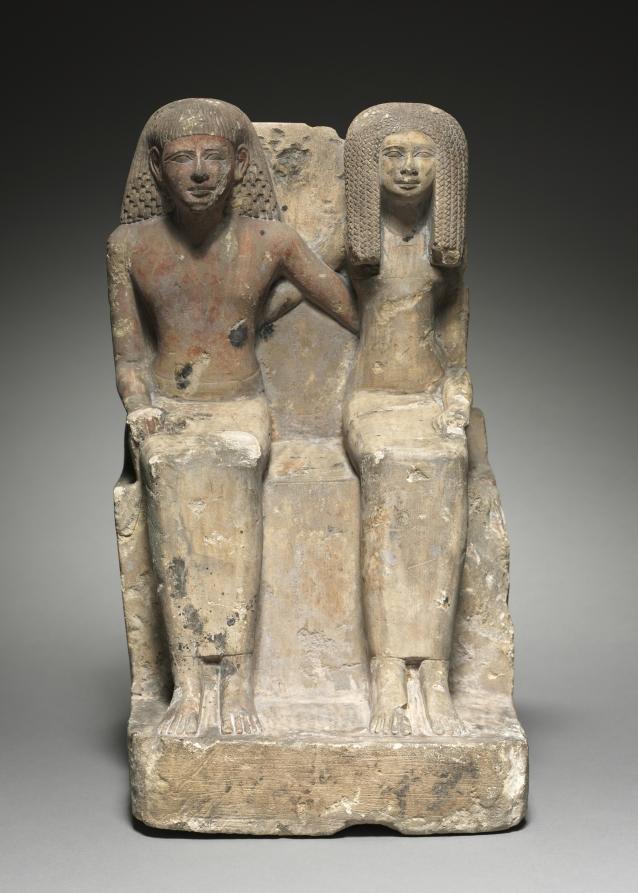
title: Seated Pair Statue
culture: Egypt, New Kingdom (1540–1069 BCE), Dynasty 18, reign of Tuthmosis III (1479–1425 BCE)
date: c. 1479–1425 BCE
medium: painted limestone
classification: Sculpture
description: Ka statues were the dwelling places for the spirits of the deceased. These sculptures—some larger than life-size—were placed in a niche in the back of the tomb.